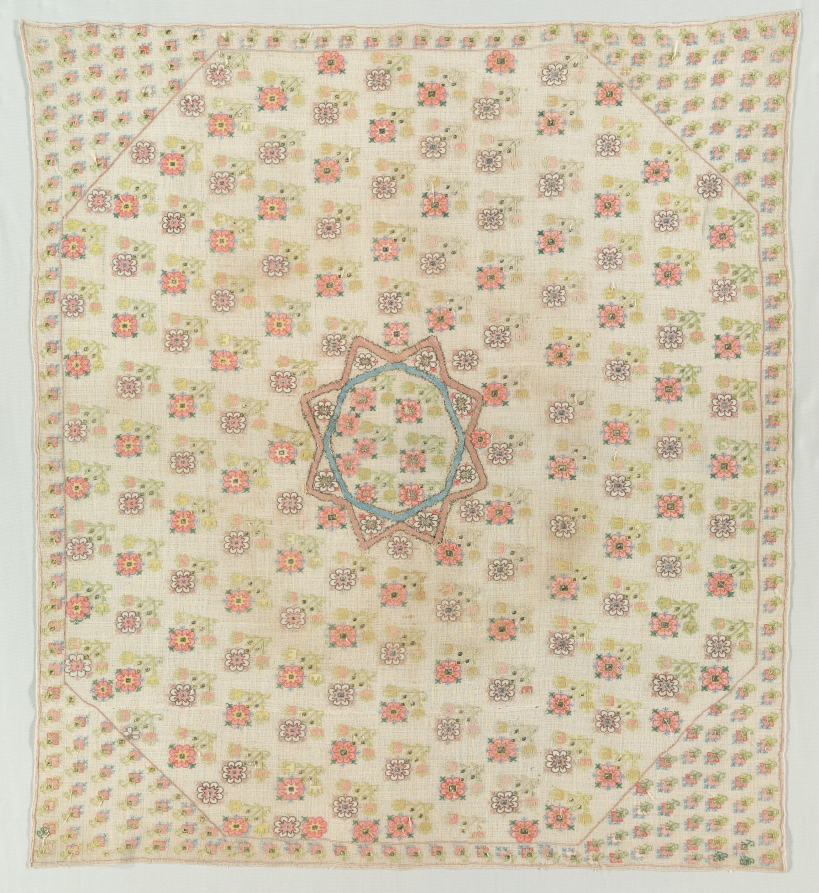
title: Embroidered Square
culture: Turkey, 19th century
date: 19th century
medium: embroidery: silk on linen tabby ground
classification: Embroidery